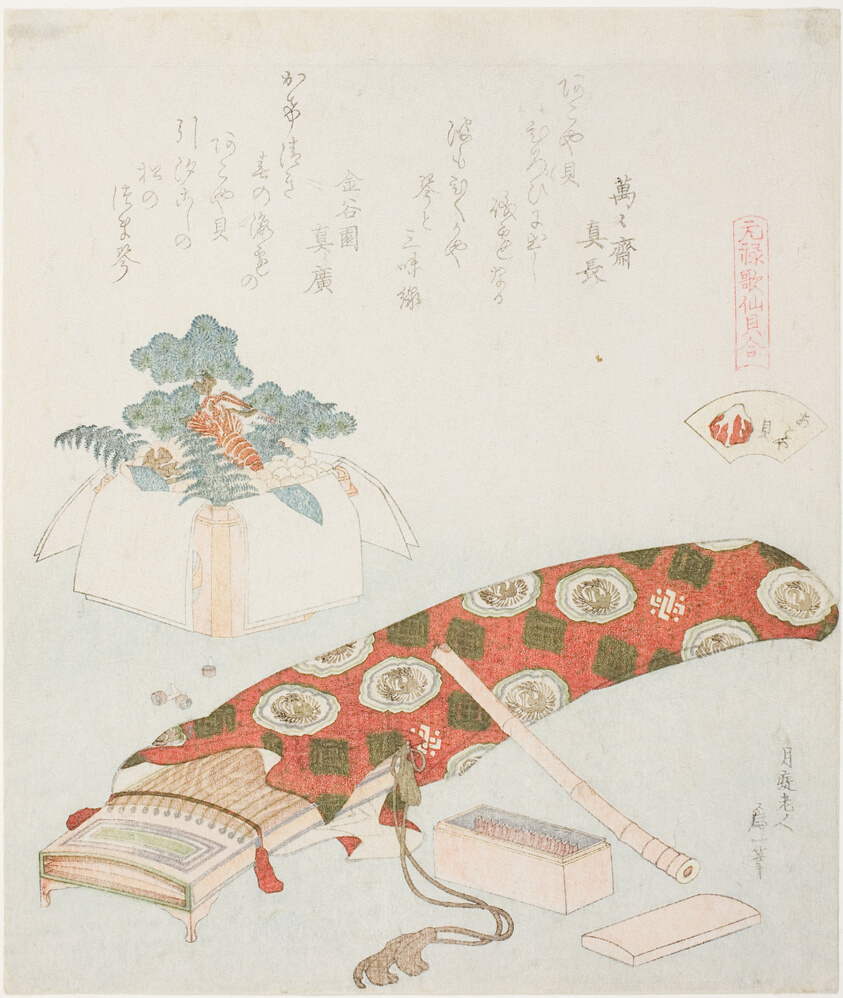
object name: Print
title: Koto and New Year’s Offering, illustration for The Akoya Beach Shell (Akoyagai), from the series "A Matching Game with Genroku-period Poem Shells (Genroku kasen kai awase)"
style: Japanese (culture or style)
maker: Katsushika Hokusai 葛飾 北斎; Japanese, 1760–1849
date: 1821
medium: Color woodblock print; nishikie with metallic pigments and blindprinting; surimono shikishiban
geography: Japan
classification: woodblock print; print; asian art